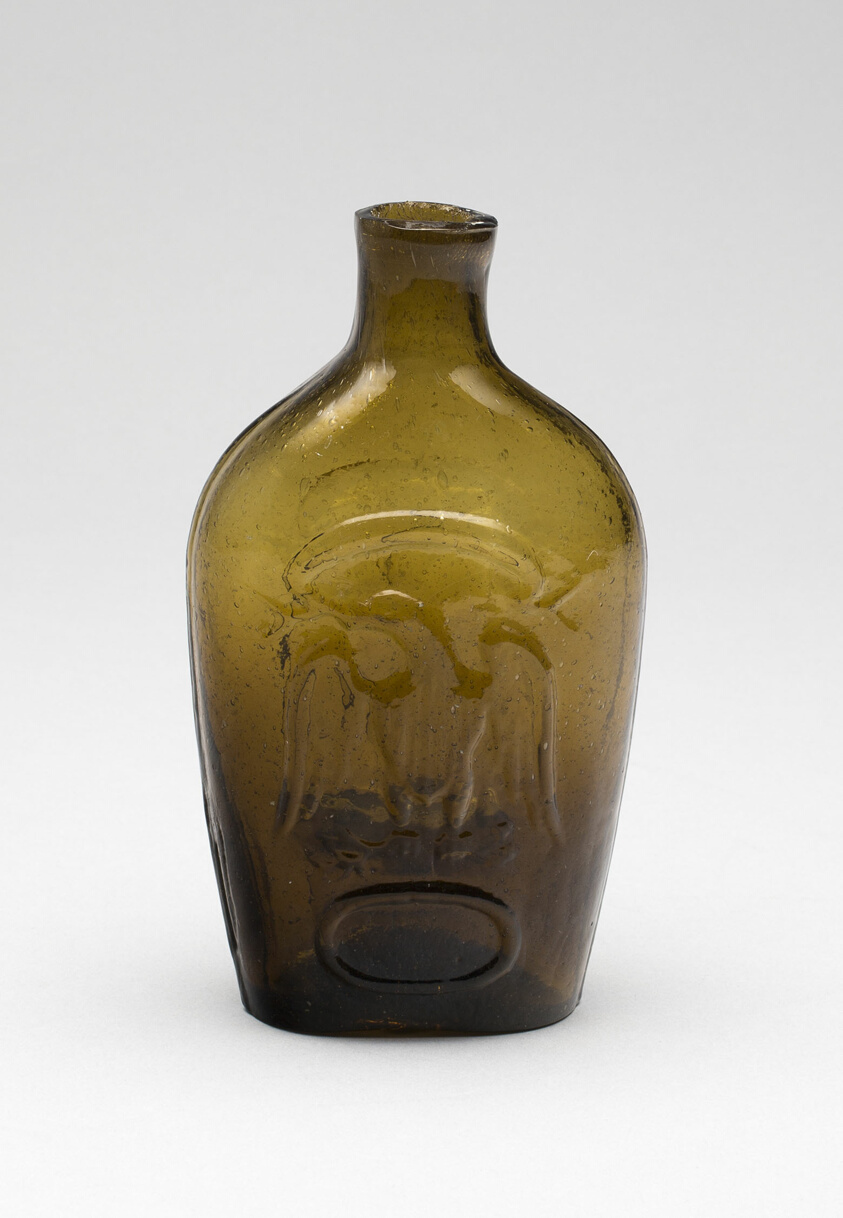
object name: Glass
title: Flask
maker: Granite Glass Works; American, 1846–1862; Stoddard, New Hampshire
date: 1846–62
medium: Glass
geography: New Hampshire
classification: flask (bottle); american decorative arts; glass (object genre); decorative arts